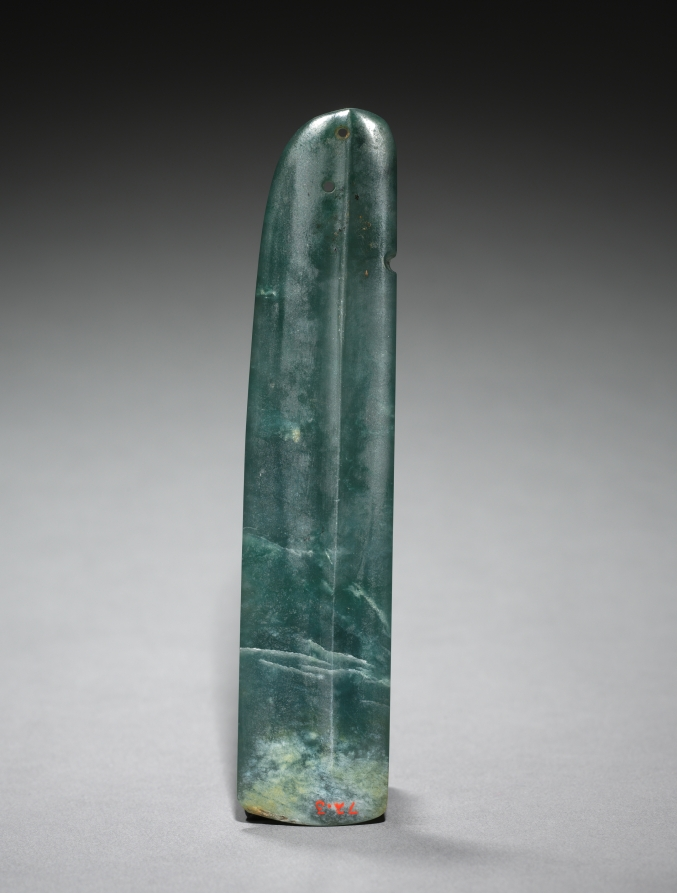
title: Ornament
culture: Mexico or Central America, Maya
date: 250–550 CE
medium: jadeite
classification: Jade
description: Greenstone ornaments were part of Maya nobles' regalia. This comes from an ornament that was cut in half in antiquity. The original, twice as wide, probably hung from an elaborate belt, crucial to royal costume.